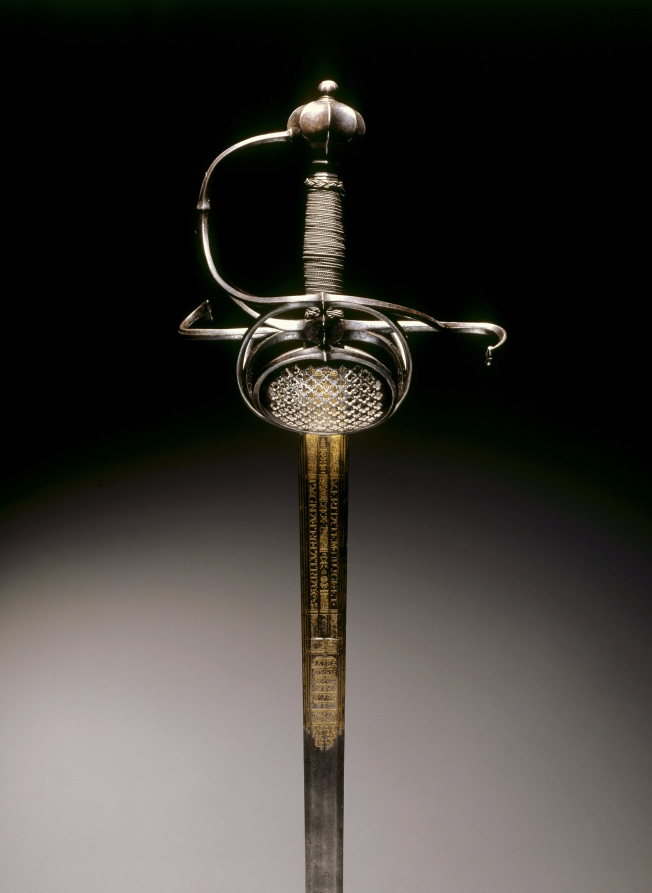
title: Rapier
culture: Germany, Solingen, 17th century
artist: Clemens Horn (German, 1586–1617)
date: c. 1620–30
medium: steel, blued and gilded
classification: Arms and Armor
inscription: NEC TEMPARE NEC TIMIDE / INTER ARMA SILENT LEGE / VERITATEM DILIGE ET PUGNA PRO PATRIA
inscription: Unicorn Head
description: This weapon has an especially handsome configuration of hilt, pommel, quillons, and guard. The blade is also very finely wrought and bears the mark (a unicorn head) of the German swordsmith, Clemens Horn, of Solingen, a town near Düsseldorf. The Latin inscription on the blade reads in translation: "Neither without cause, nor fearfully/Between arms and silent law/ Prize truth and the fight for one's country."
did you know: The "Pappenheimer" hilt seen here is named after Count Pappenheimer (1594-1632) who popularized the style which offered more protection to the hand with its large pierced plates.